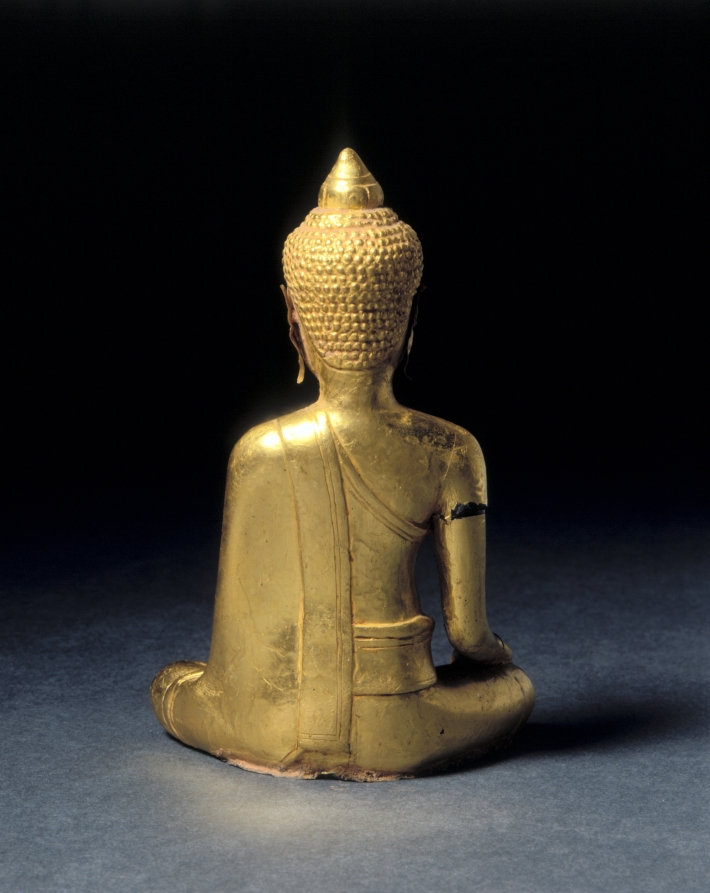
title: Seated Buddha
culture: Thailand, Ayutthaya, Wat Ratchaburana, 14th century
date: before 1424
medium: gold with resin core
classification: Sculpture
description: This pristinely modeled Buddha was fashioned from a sheet of 24-karat gold, using the repoussé (hammering) technique. The figure is filled inside with a resin core. The style is typical of the last phase of Khmer art (800s–1400s), the Lapburi style, which combines characteristics of both Cambodian and Thai sculptural styles.